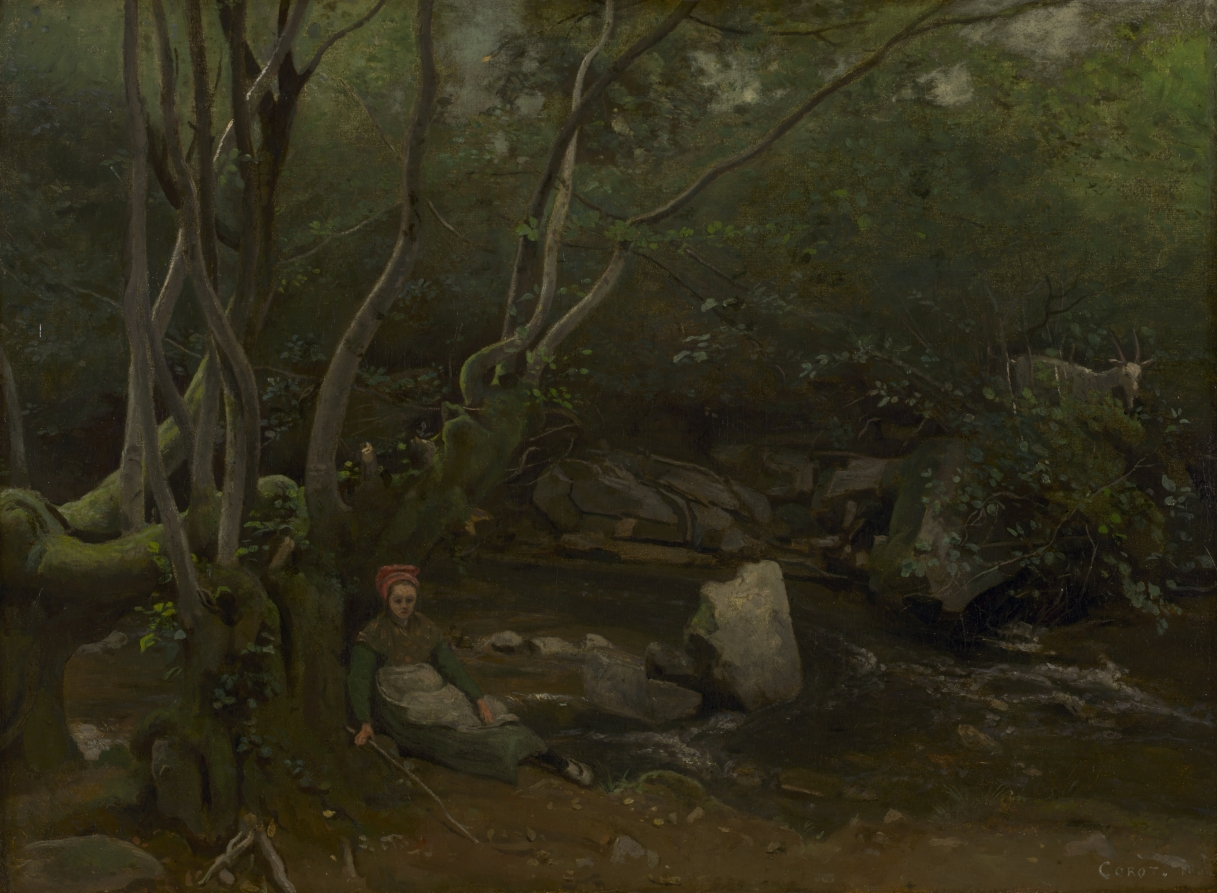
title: Lormes: Goat-Girl Sitting Beside a Stream in a Forest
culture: France, 19th century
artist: Jean Baptiste Camille Corot (French, 1796–1875)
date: 1842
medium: oil on fabric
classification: Painting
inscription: Signed lower right: Corot 1842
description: Camille Corot painted this charming woodland scene during the summer of 1842 while visiting Lormes, a small village in the Morvan region of Burgundy. The area was known for its dense woodlands and picturesque falls. Corot included a seated goat shepherd leaning against a curving tree trunk, but instead of commanding the viewers attention, the human presence is overshadowed by the dynamic interlacing forms of the tree trunks and branches that stretch up and across the canvas.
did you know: Claude Monet once said: "There is only one master here—Corot. We are nothing compared to him, nothing."